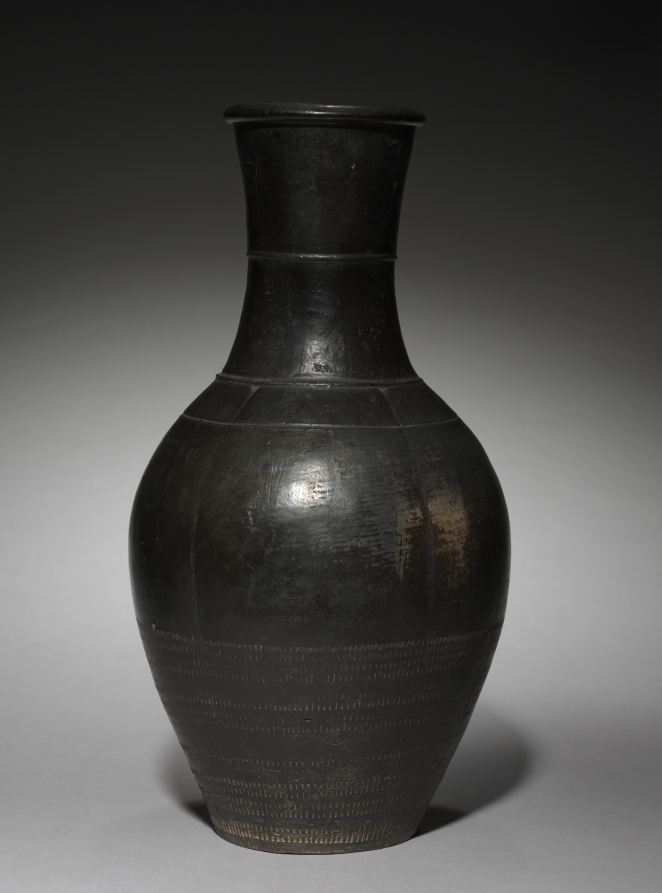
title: Vase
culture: Northeast China, Liao dynasty (916-1125)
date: 916–1125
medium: burnished stoneware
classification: Ceramic